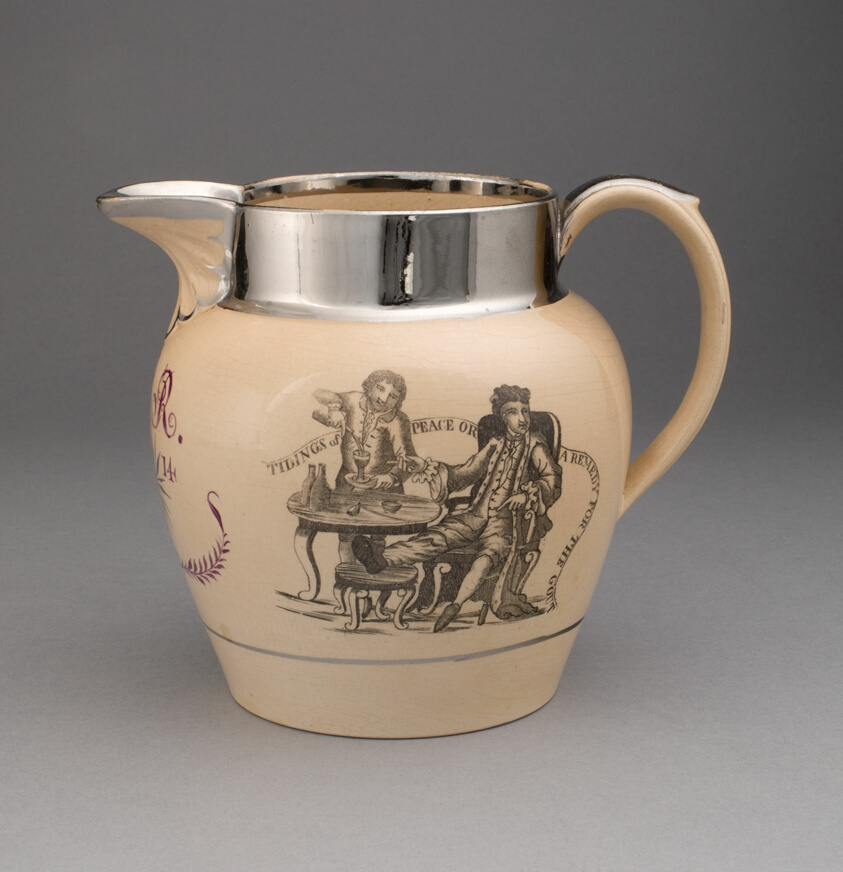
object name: Ceramics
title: Pitcher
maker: England, Staffordshire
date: 1814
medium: Lead-glazed earthenware with lustre decoration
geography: Staffordshire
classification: pitcher (vessel); earthenware; vessel; european decorative arts; ceramics